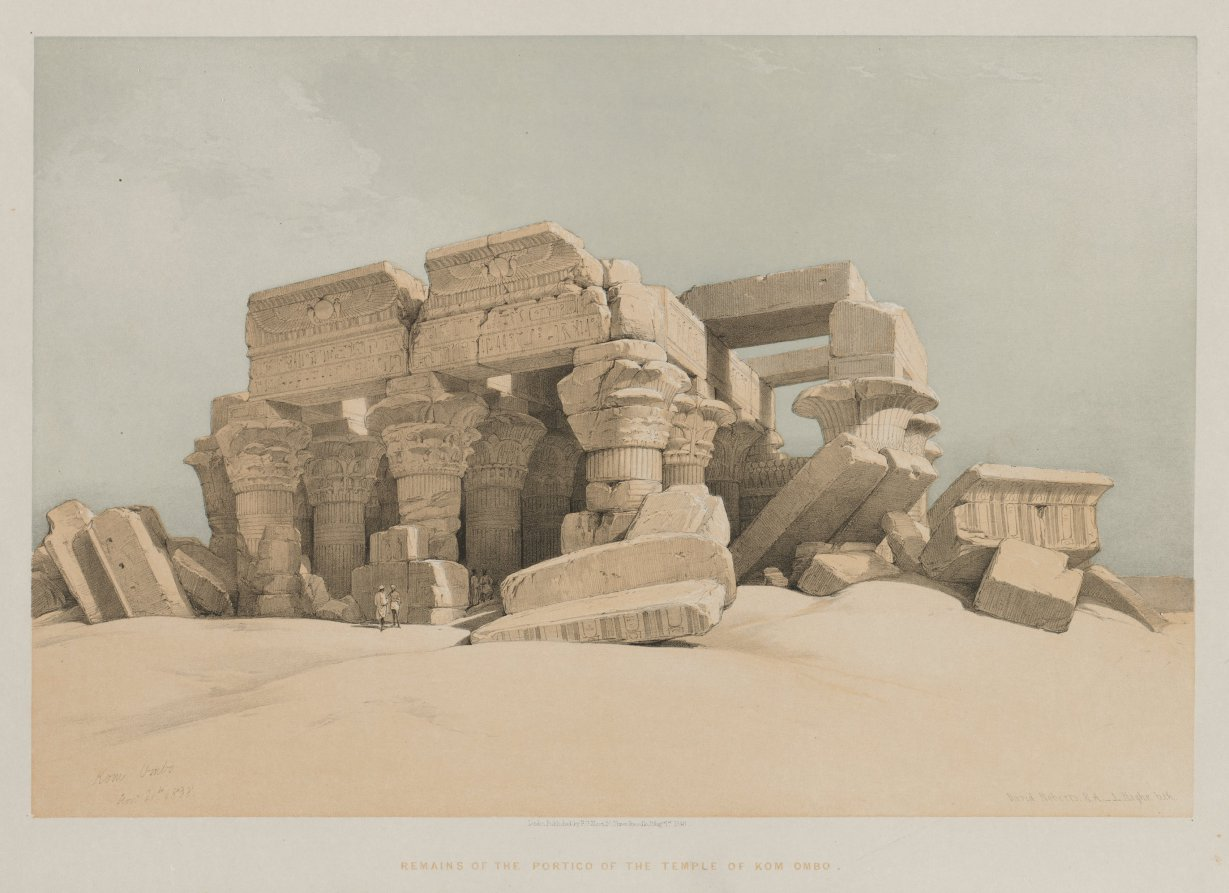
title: Egypt and Nubia, Volume II: Kom-Ombo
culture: England, 19th century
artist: Louis Haghe (British, 1806–1885)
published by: F. G. Moon, 20 Threadneedle Street, London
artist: after David Roberts (Scottish, 1796–1864)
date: 1846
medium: color lithograph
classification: Print